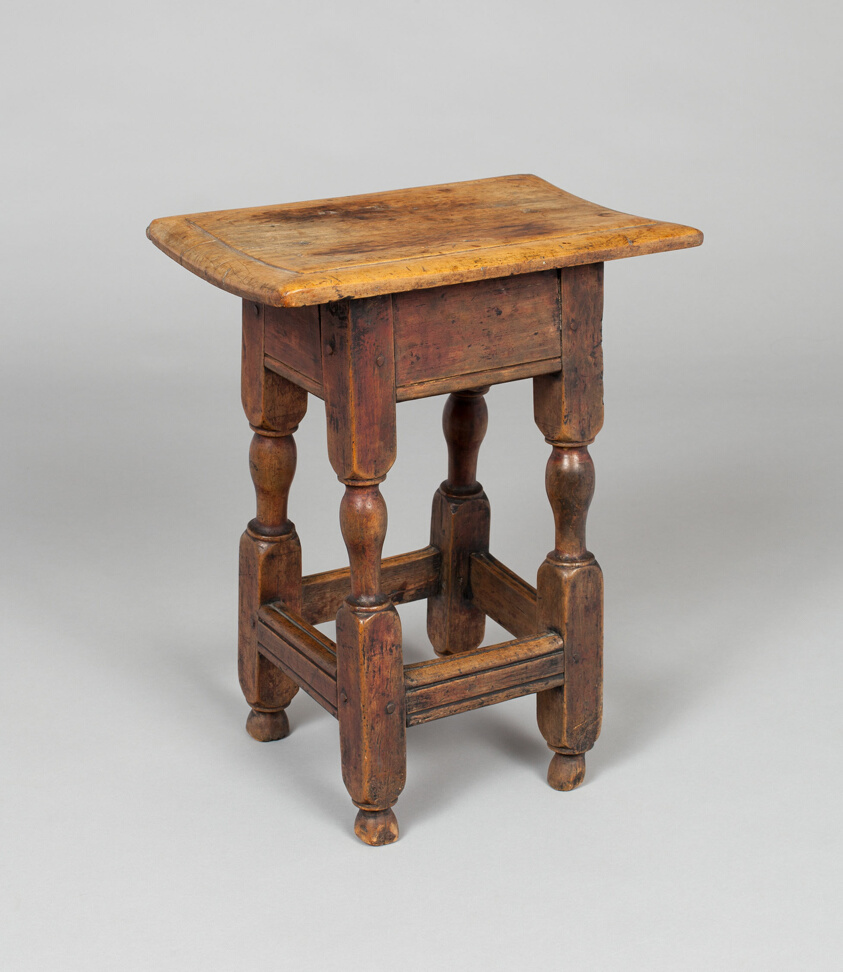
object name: Furniture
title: Joint Stool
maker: Artist unknown (American, 17th–18th century)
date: 1680–1710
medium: Maple and pine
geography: United States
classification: seating; furniture; american decorative arts; american arts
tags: furniture